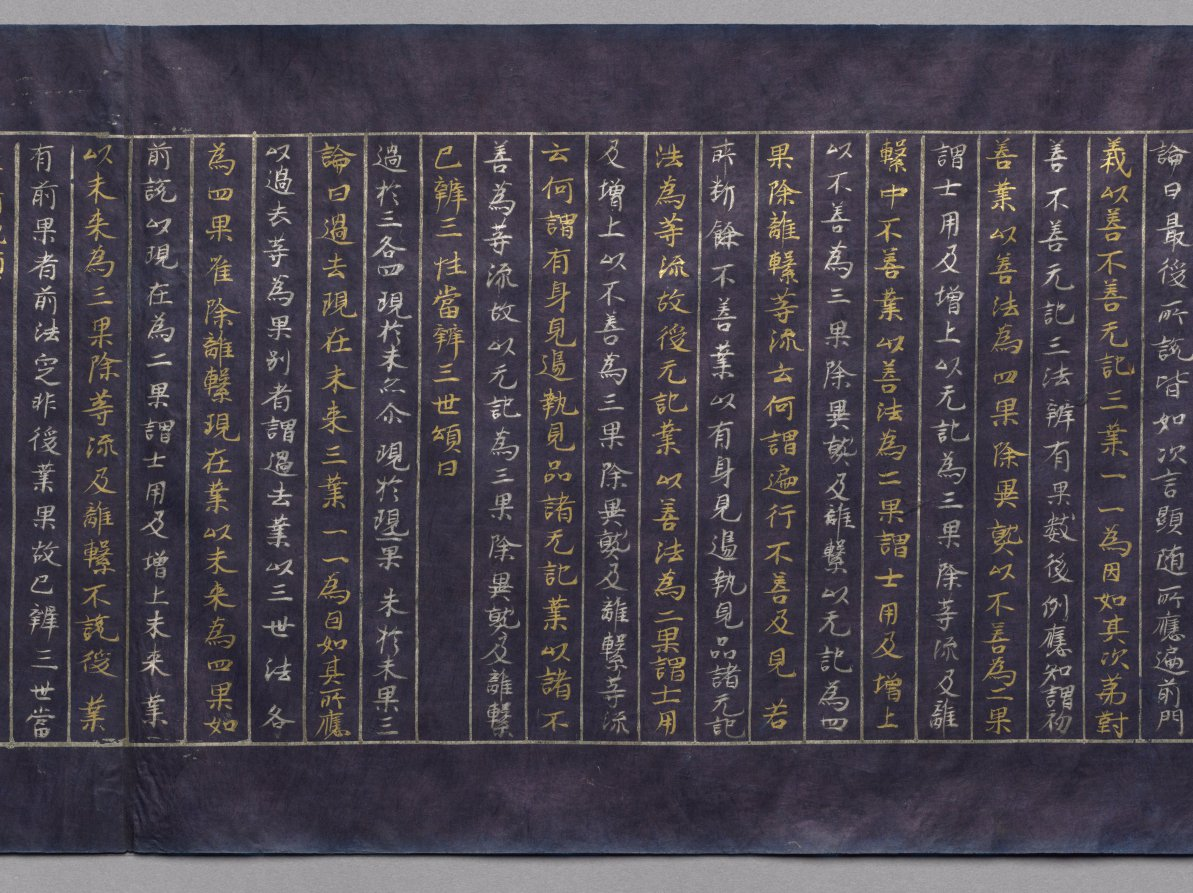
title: Meta-Discourse on the Teachings from the Treasury (Abidharmakosha-Bhashya)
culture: Japan, Heian period (794–1185)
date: 1100s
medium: handscroll; gold and silver on indigo-dyed paper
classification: Manuscript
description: This religious text relates some of the teachings of the great fourth-century Indian Buddhist scholar Vasubhandhu. The text analyzes human consciousness in its relationship to the environment and transformations that occur during meditation. This scroll is the 17th part of a 30-part translation of the text by Xuanzang, an eminent seventh-century Chinese monk.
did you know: The frontispiece depicts the Buddha Shakyamuni preaching in a paradisical landscape.